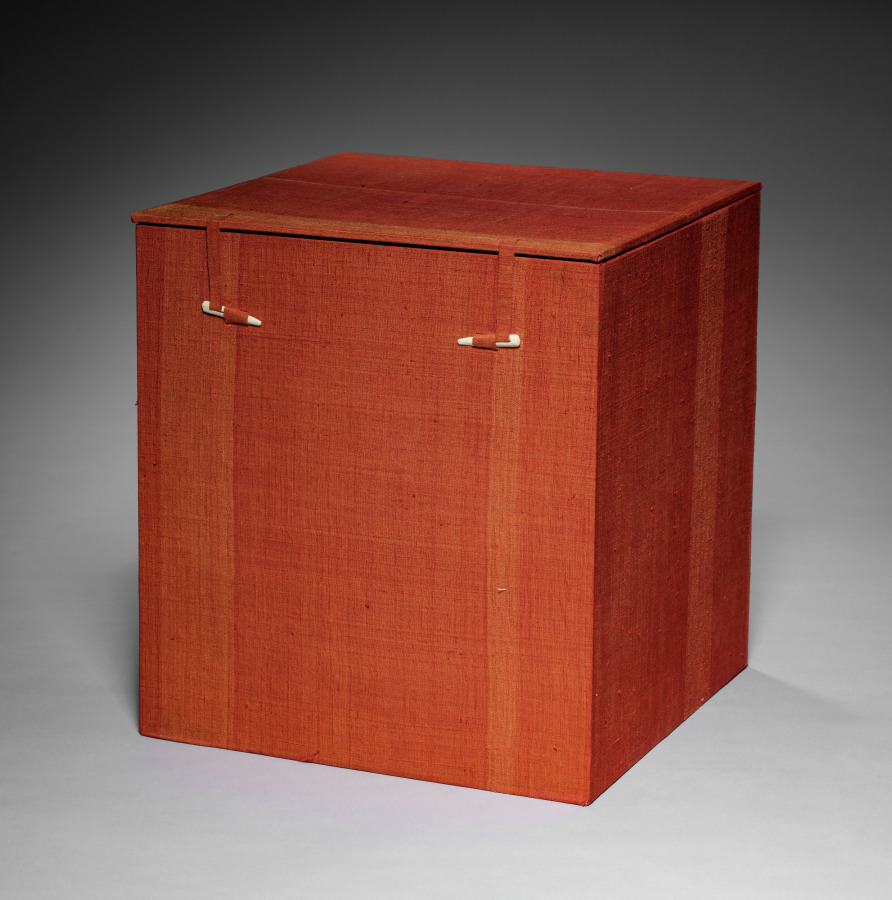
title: Baluster Jar and Cover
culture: China, Jiangxi province, Jingdezhen kilns, Ming dynasty (1368–1644) or Qing dynasty (1644–1911)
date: 1600–1650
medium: Porcelain with wucai (five-color) enamels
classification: Ceramic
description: The central motif on this jar is a mountain emerging from the sea, symbolizing Mount Sumeru in Buddhist cosmology, and representing the central axis in the universe in Daoism. White cherry blossoms floating on the wavy ground are surrounded by auspicious symbols such as the coin for wealth and the lozenge for victory. The yellow knob on the jar’s cover depicts a cherry blossom. Other fortuitous motifs—such as the leaf of protection, the pearl to grant wishes, the stone chime for celebration, rocks symbolizing longevity—also decorate the lid. While most jars have lost their covers over time, this jar retains its original lid.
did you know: The waves are depicted in a rich aubergine, or purple, glaze.